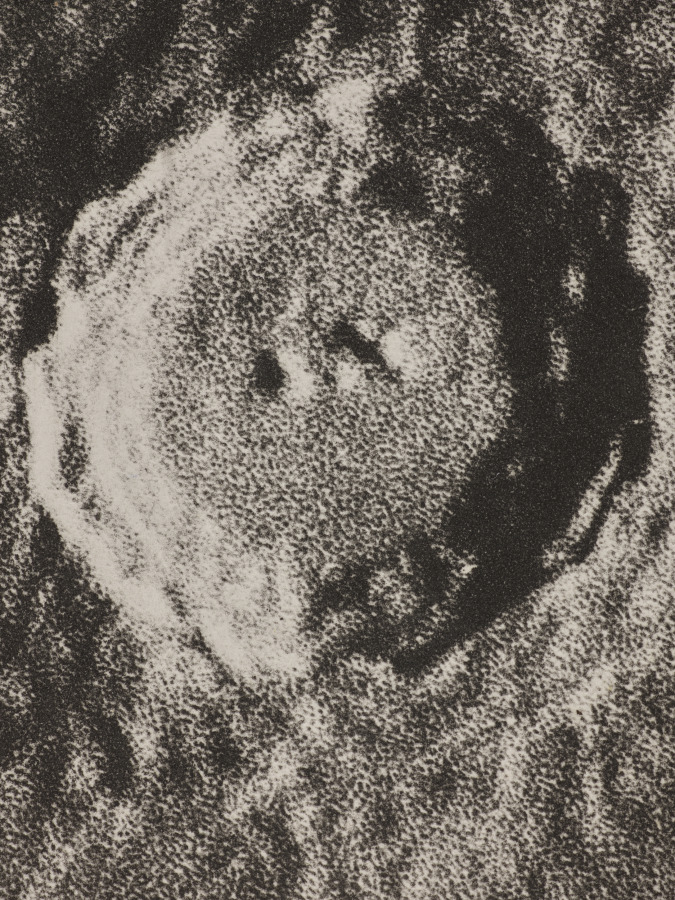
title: Photographie Lunaire: Copernic-Képler-Aristarique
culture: France, 19th century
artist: Maurice Loewy (French, 1833–1907)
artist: Pierre Henri Puiseaux (French, 1855–1928)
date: 1896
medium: photogravure (heliogravure)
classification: Photograph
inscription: Imprinted in black type on recto of photo paper: "Grand Equatorial Coude" Imprinted in black type on recto of photo paper: "1896. 29 Septembre 16 h O.tin.Paris Agrandissement 8.75 Diametre Lunaire 1 m 43" Imprinted in black type along each edge: "1-9" Imprinted in black type on gallery label on verso: "Fraenkel Gallery/49 GEARY STREET SAN FRANCISCO 94108/FURTHERMORE/[30TH Anniversary Exhibition]/Fraenkel Gallery/April 22-June 26, 2010" Imprinted in black type on gallery label on verso: "Fraenkel Gallery/49 GEARY STREET SAN FRANCISCO 94108/LOEWY & PUISEUX/Photographie Lunaire: Copernie-Kepler-/Aristarique, Septembre 29, 1896 heliogravure/22-1/2 x 18-3/4 inches (image)/29-1/2 x 22 inches (sheet)/Plate XVI/[LP.0302.Z]"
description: This plate is from a deluxe 12-volume atlas of the moon created by astronomers Maurice Loewy and Pierre Henri Puiseaux. The atlas remained the most accurate reference of the moon’s surface until the age of space travel. The duo captured thousands of images at the Paris Observatory through a telescope that Loewy invented. It was equipped with a mechanism that tracked the moon’s movements during the exposures. Given weather conditions, they were only able to photograph 50 to 60 nights per year; the project thus took 15 years to complete and contained nearly 100 large-scale photogravures.